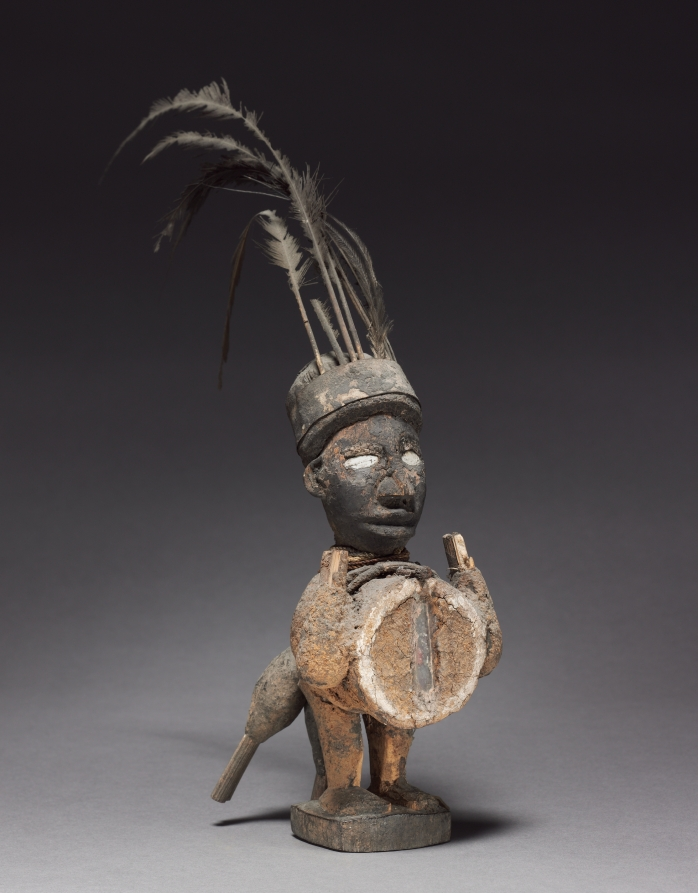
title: Power figure (nkisi)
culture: Africa, Central Africa, Republic of the Congo, Kongo-style maker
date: late 1800s-early 1900s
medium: Wood, metalized glass, organic materials (including resin), feathers, plant fibers, iron, and copper alloy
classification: Sculpture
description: One of seven minkisi figures previously in the René and Odette Delenne collection, this object contained medicines in which an ancestral spirit was believed to reside. This figure is one of the two tallest in the collection. Feathers of a bird of prey adorn its head, with two small guns pointing upward and a third hanging down. It had belonged to “the sorcerer of Louboulou.”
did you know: This is one of two tallest in the collection of spiritual figurines loaded with gunpowder to shoot at witches: nduda, or “night guns.”